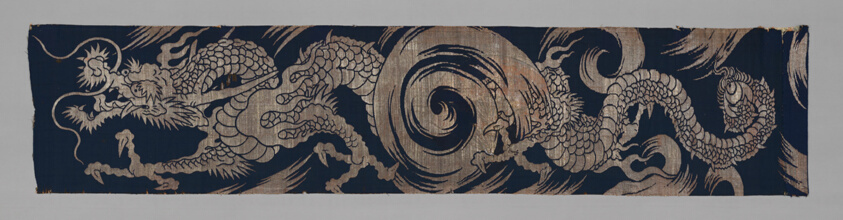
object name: Textile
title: Tobari or Mizuhiki (Temple Banner)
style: Japanism, asian, meiji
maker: Japan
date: Meiji period (1868–1912), 1801/33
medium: Silver brocade, ginram on navy.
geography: Japan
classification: textile; weaving